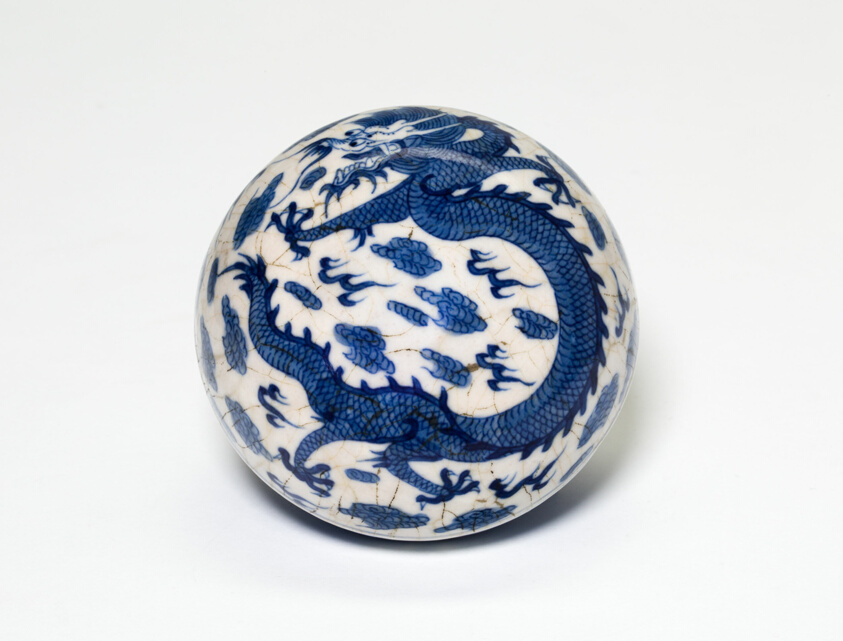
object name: Vessel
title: Covered Circular Box with a Dragon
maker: China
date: Ming dynasty (1368–1644) Chenghua reign mark and period (1464–1487)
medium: Porcelain painted in underglaze blue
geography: China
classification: porcelain; asian art; ceramics